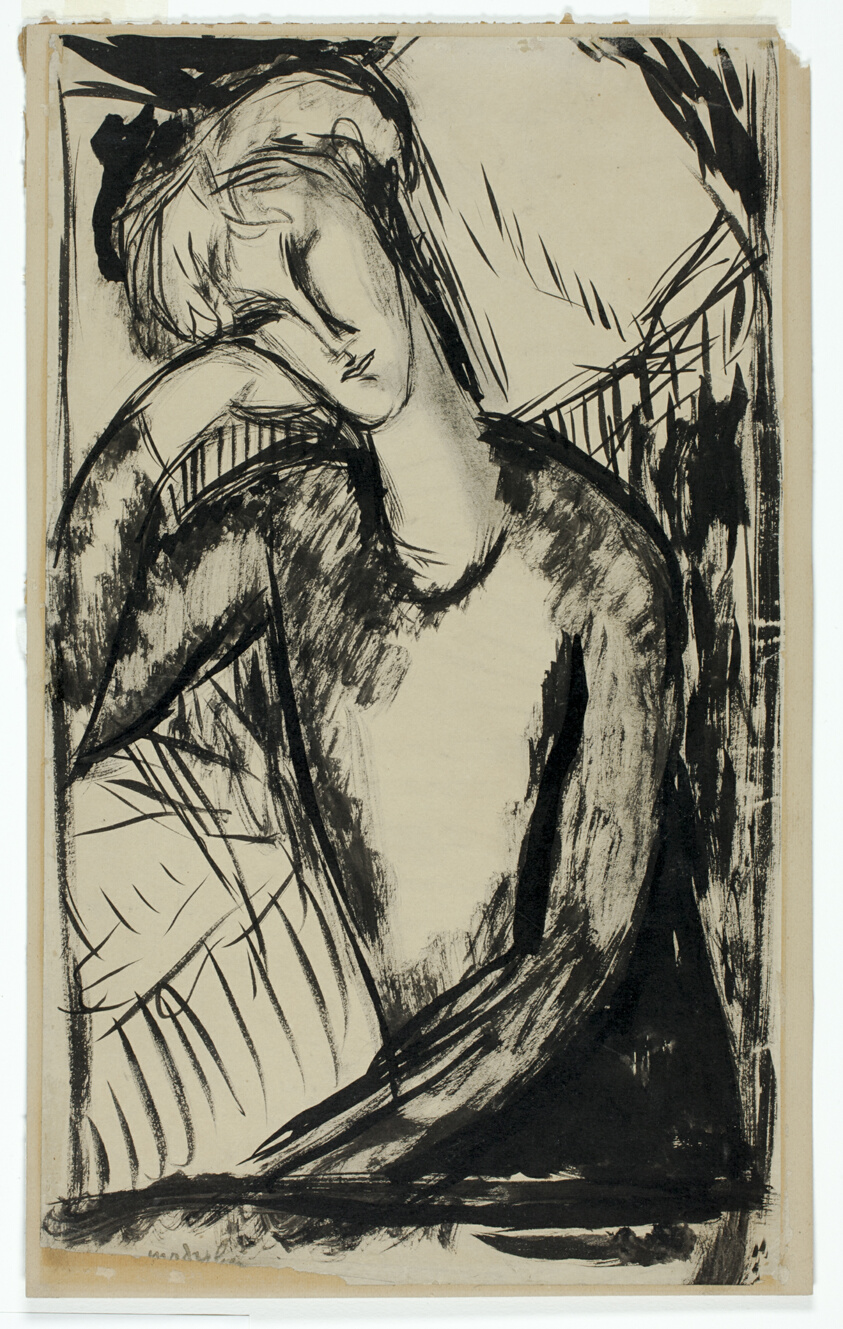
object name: Drawing and Watercolor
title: Portrait of a Young Woman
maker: Amedeo Modigliani (Italian, 1884-1920)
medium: Brush and black ink and black watercolor on tan wove paper, laid down on tan wove card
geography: Italy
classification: pen and ink drawings; drawings (visual works); prints and drawing